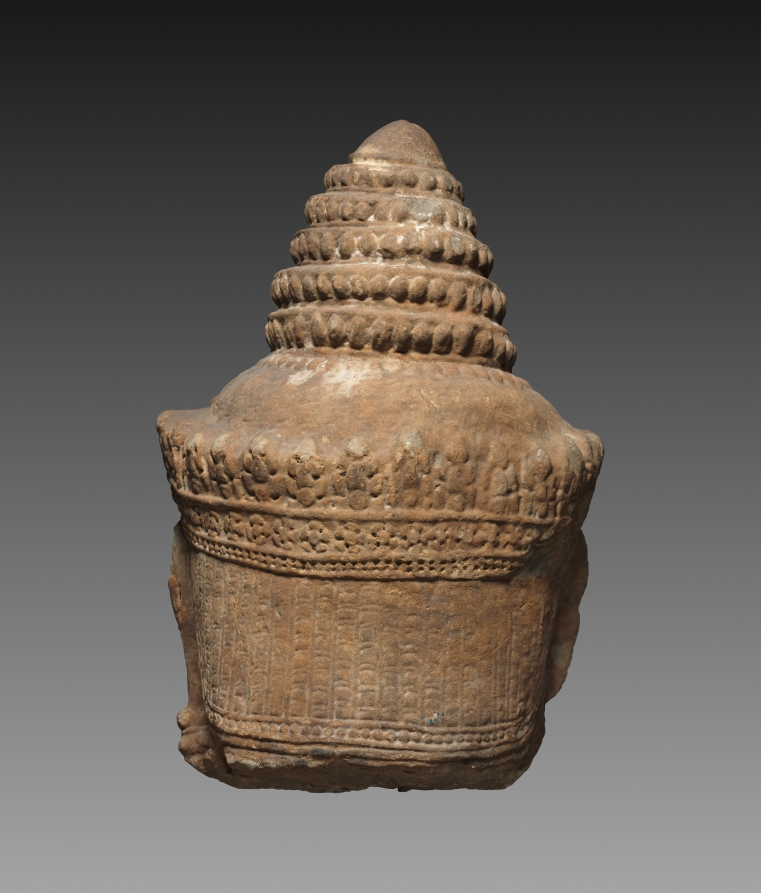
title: Colossal Head of a Deva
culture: Cambodia, Angkor, Preah Khan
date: c. 1200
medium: sandstone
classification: Stone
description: This head is from one of the gods (devas in Sanskrit) who, according to Hindu myth, churned the primordial Ocean of Milk to extract the nectar of immortality. Using a mountain as a churning rod and a serpent as the rope, the gods on one side and the demons on the other vied to win the nectar. The gods prevailed and achieved immortality.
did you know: The deity’s conical tiara consists of a diadem with floral decoration and is topped by a five-tiered lotus narrowing upward.